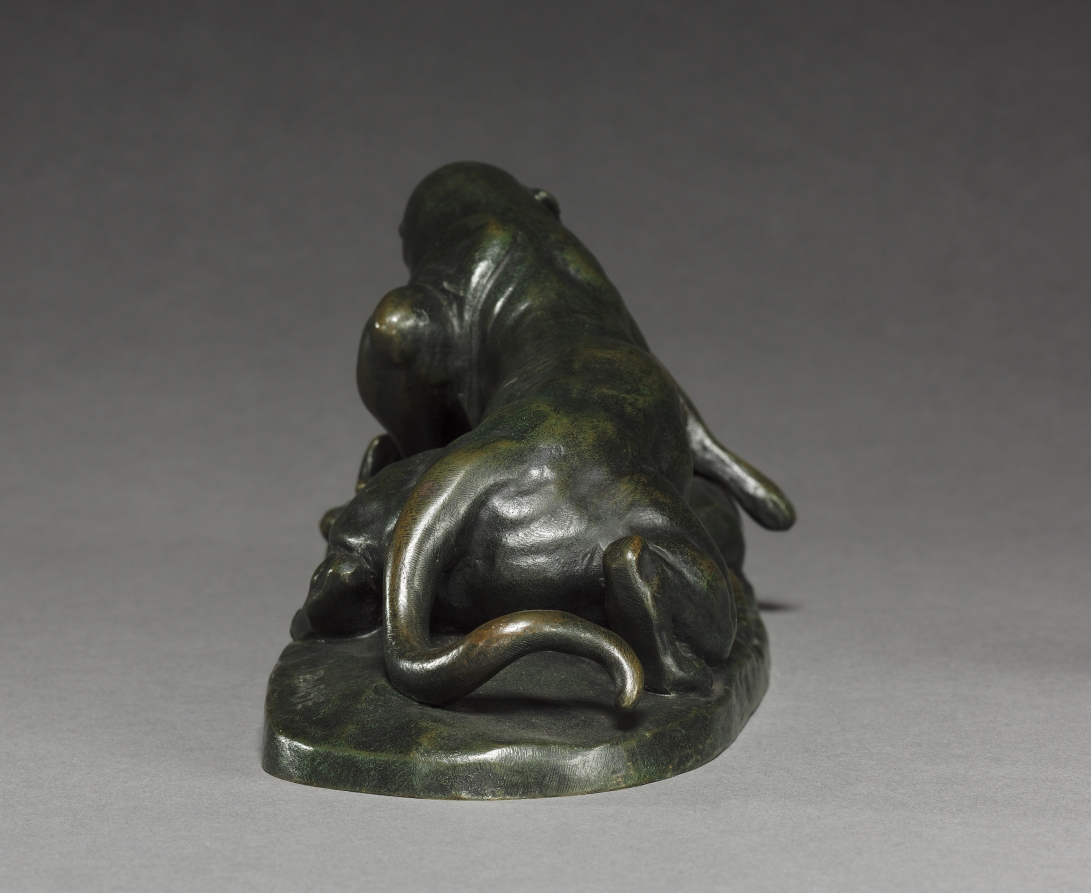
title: Jaguar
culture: France, 19th century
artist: Antoine-Louis Barye (French, 1796–1875)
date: c. 1850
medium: bronze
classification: Sculpture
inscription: On base, back of left hind leg: (L?). Barye"